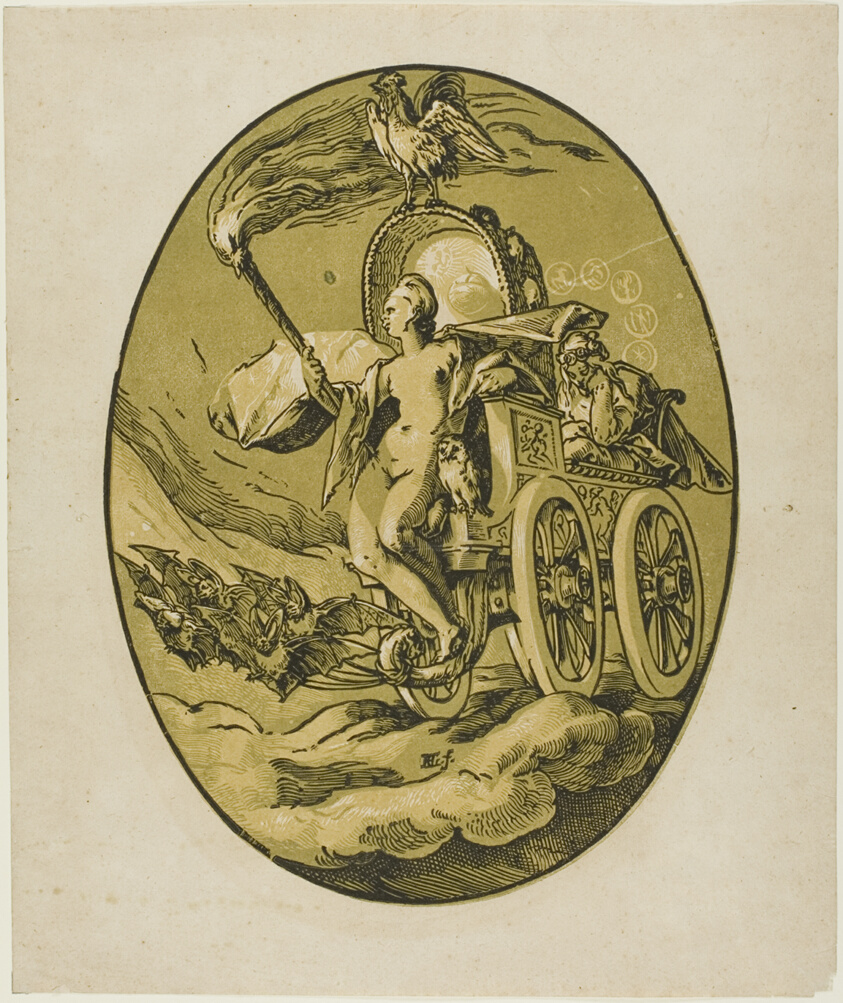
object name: Print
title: Nox, plate seven from Demogorgon and the Deities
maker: Hendrick Goltzius; Dutch, 1558-1617; second edition printing by Willem Jansz. Blaeu; Amsterdam, 1605-1620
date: 1588/90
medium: Chiaroscuro woodcut from three blocks of black, ochre and olive green, on ivory laid paper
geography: Netherlands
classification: woodcut; print; prints and drawing